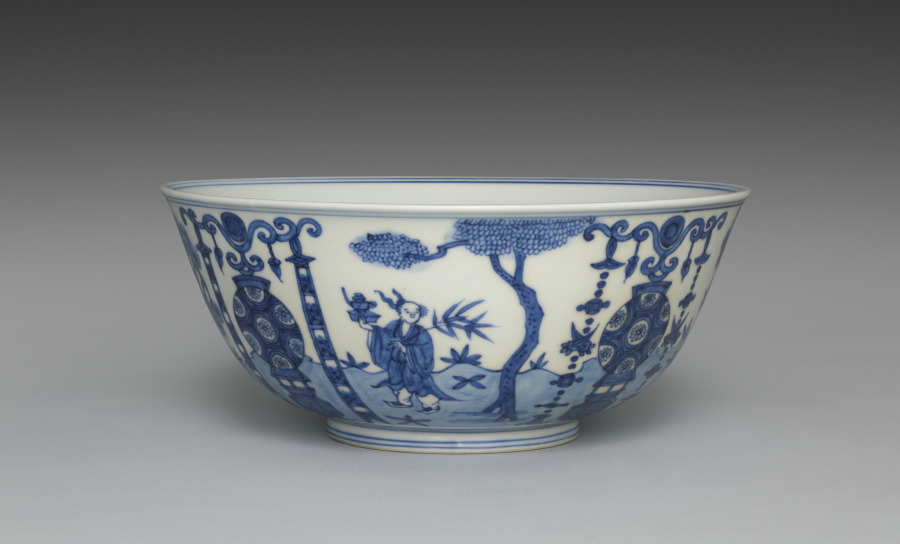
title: Bowl from Nesting Bowls with Daoist Immortals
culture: Japan, Meiji period (1868–1912)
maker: Seifū Yohei III (Japanese, 1851–1914)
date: 1893–1914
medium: Middle bowl from a set of three bowls; porcelain with underglaze blue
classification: Ceramic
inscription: 大日本清風造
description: Yohei III was capable of ink painting–like compositions in underglaze blue, as well as more decorative ones like that on this set of three nesting bowls. Bowls with very similar designs in five colors were produced in the reign of the Wanli emperor (r. 1572–1620 ) during the Ming dynasty, and Yohei must have had direct access to one of these or to a close copy. A scene of Daoist immortals is presented on the bowls. On each one, the ground plane is defined with a blue wash. Four lanterns are evenly spaced around the bowl. Two are flanked with linked-piece metalwork banners of the seven treasures. The alternate altars are adorned with textile banners. In between them are four immortals, each standing beneath a tree with small plants surrounding his feet. Two of the immortals hold fruit on a tray. Another carries an elixir-filled ewer and a willow branch. The fourth holds a swastika (manji), here an auspicious symbol, and a flower. Curiously, the inscription inside each footring reads “Made by Seifu of Great Japan,” in emulation of the dynasty and reign inscriptions that appear on Chinese ceramics; but one can also see through the translucent glaze another inscription, “Seifu Yohei,” written in large characters within a double band of blue on the largest bowl.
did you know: In the bottom of each bowl is a scene of two robed immortals who appear to stand on a precipice in a mountainous landscape high in the clouds, with celestial orbs over their heads.